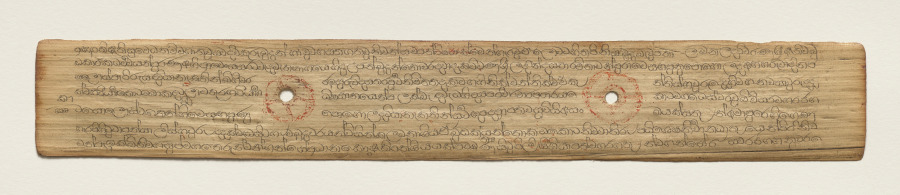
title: Leaf from a Buddhist Manuscript (recto)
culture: Sri Lanka, Singhalese, Late 17th century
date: c. 1700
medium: fiber paper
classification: Manuscript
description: Palm leaf material is still used for manuscripts in Sri Lanka. The palm leaves are prepared first by boiling them, drying them in the sun, and then rubbing them with oils. Scribes then use a metal stylus to incise the text. Then charcoal powder is wiped across the pages, filling in only the inscribed lines.